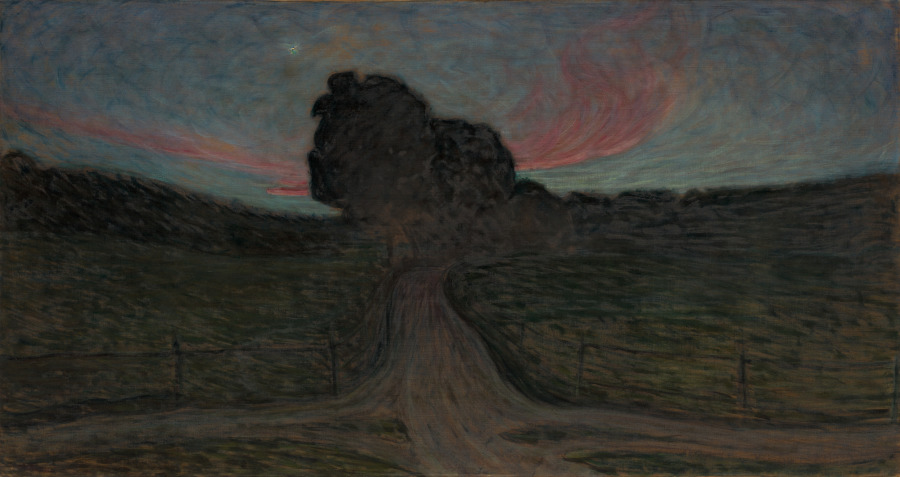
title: Evening Mood-Lidingö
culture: Sweden, 20th century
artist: Eugène Jansson (Swedish, 1862–1915)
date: 1900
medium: oil on canvas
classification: Painting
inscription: Unsigned; inscribed on the stretcher in blue ink, "A. Jansson' (the artist's brother) and "HERR R. BERGH, 40 BAS 4 TR OG JANSSON'. Inscribed on the stretcher in red ink "G.J.'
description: The swirling brushstrokes and telescopic perspective in this view of a field near Stockholm, Sweden, converge on the dark mass of trees and dying sunset in the center. Feelings of melancholy and loneliness are relieved only by the appearance of the first evening star. Although little known in the United States, Eugène Janssen was one of the most important artists of Scandinavian modernism. He became aware of the works of the Norwegian Symbolist Edvard Munch as early as 1884 and shared Munch’s ambition of exploring psychological states of mind rather than adhering to external appearances.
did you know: Jansson, known as the "Blue Painter," was called "Paraffin Jansson" by other artists because the light in his paintings reminded them of the light from the paraffin (kerosene) lamps widely used in houses at the time.